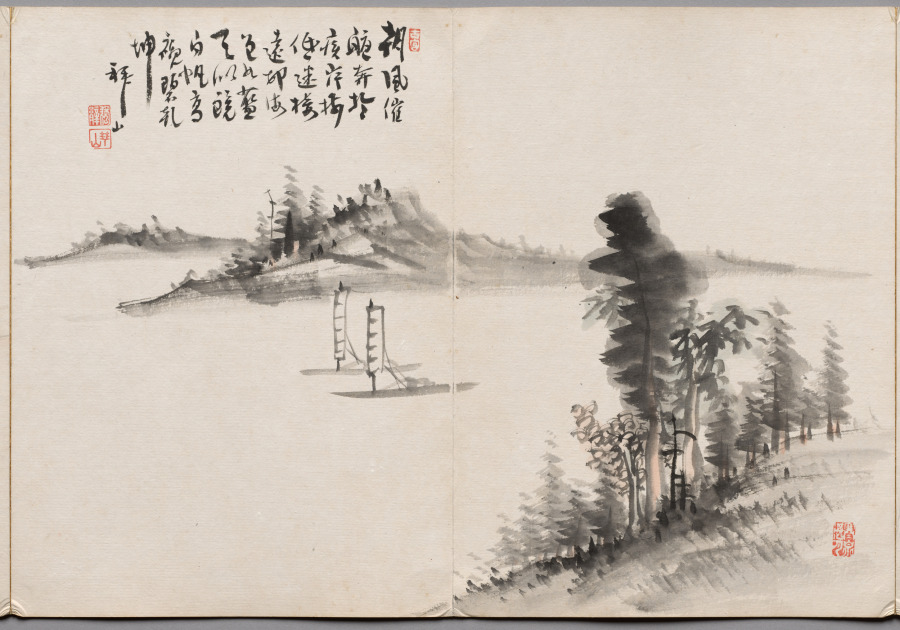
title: Painting Five from Album of Paintings by Haizan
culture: Japan, Meiji period (1868–1912) or Taishō period (1912–26)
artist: Yoshitsugu Haizan (Japanese, 1846–1915)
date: late 1800s–early 1900s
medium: page spread from double-sided accordion album; ink and color on paper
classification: Painting